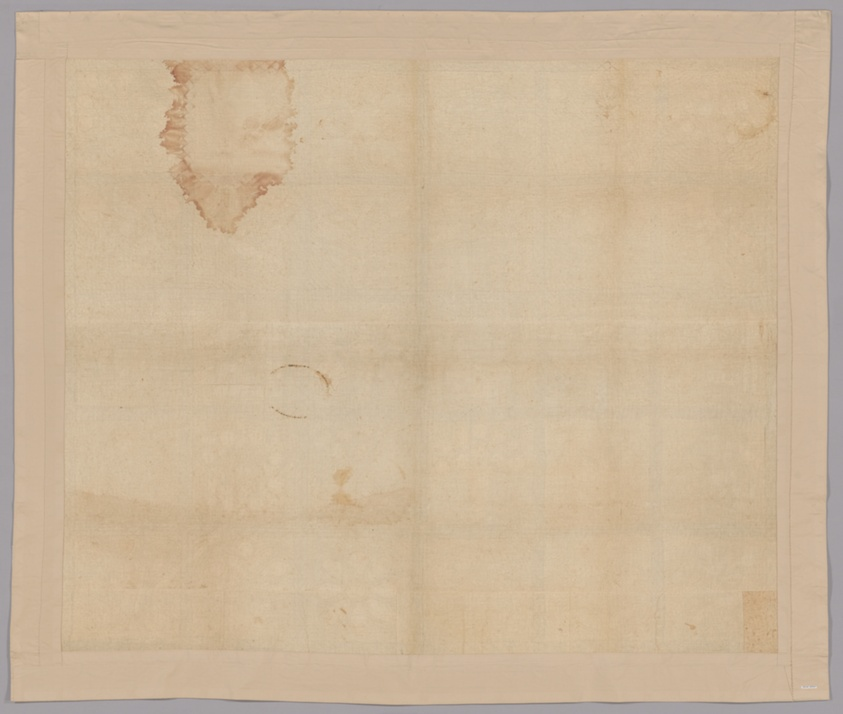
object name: Textile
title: Album Quilt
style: 19th century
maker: Sarah Ann Wilson (American, active mid-19th century); New York or New Jersey, United States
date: 1854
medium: Appliquéd, pieced and embroidered quilt; dyed, undyed and printed cotton plain weave fabrics and cotton and silk velvet fabric; cotton embroidery threads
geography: New York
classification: needlework - quilt; textile; embroidery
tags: floral patterns, heart shape, circles, squares, bird, fish, boars, deer, lions, animals, houses, people, trees, flowers